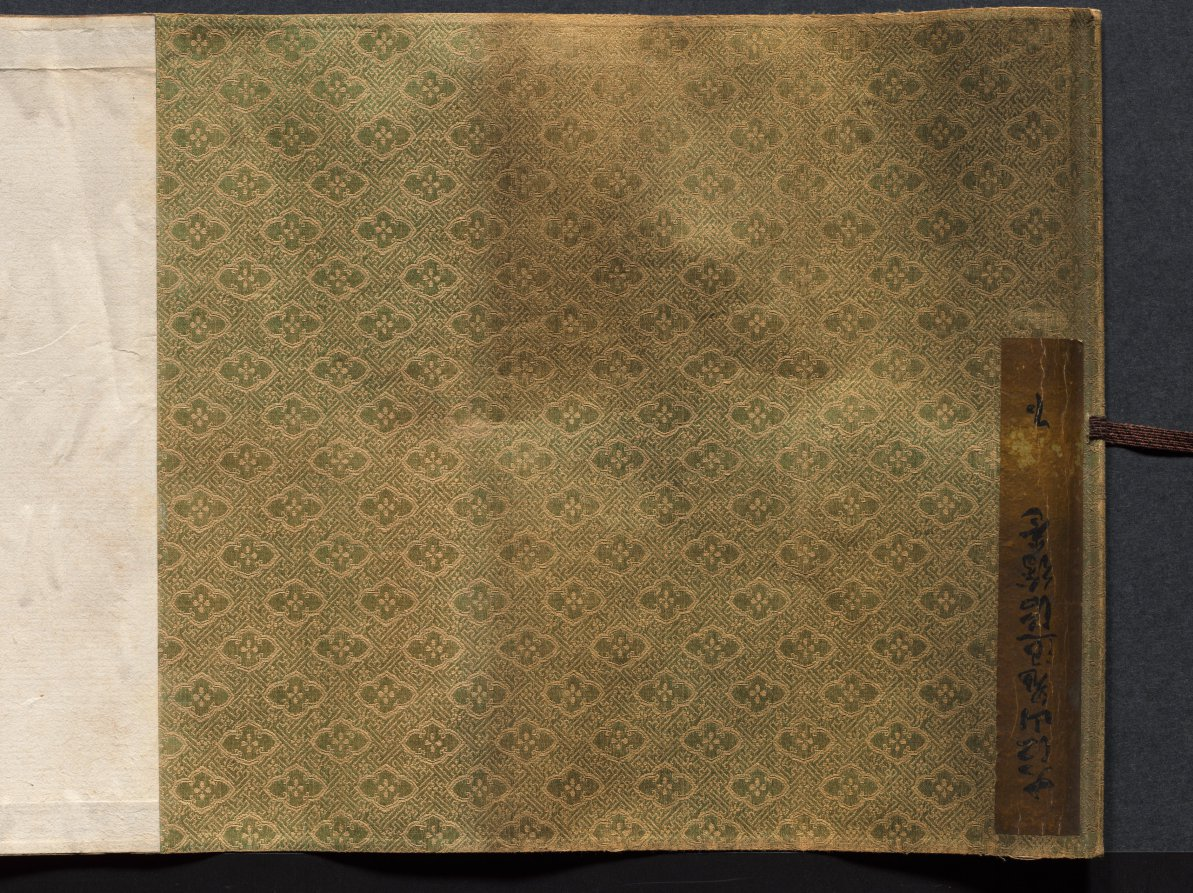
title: Oeyama Engi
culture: Japan, Edo period (1615–1868)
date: 1615–1868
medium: one of a pair of handscrolls; ink and color on paper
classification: Painting